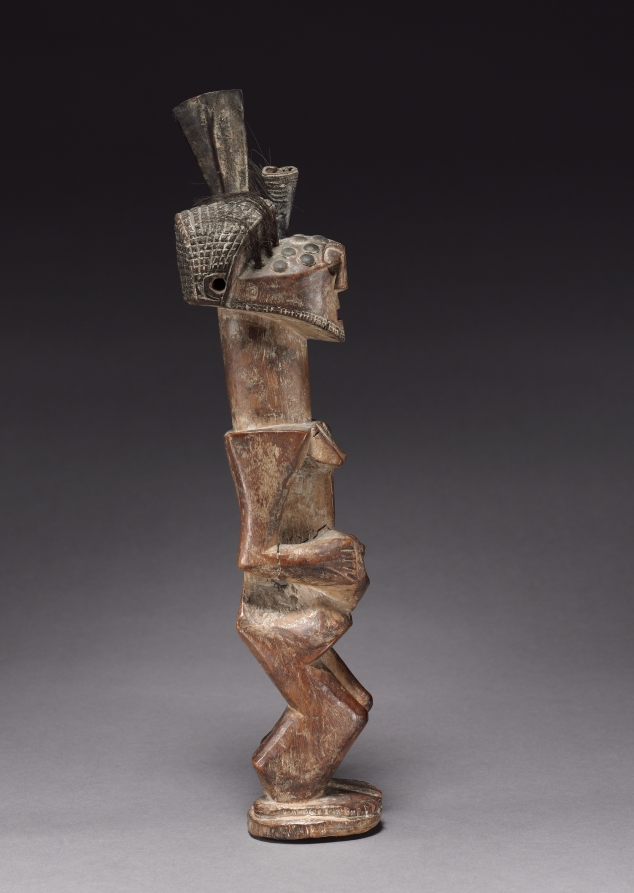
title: Female Figure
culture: Africa, Democratic Republic of the Congo, Songye people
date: late 1800s-early 1900s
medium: Wood, upholstery studs, antelope horns, and animal hair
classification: Sculpture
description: Mankishi figures were believed to have magical powers and were used by diviners to contact spirits in otherworldly realms. Smaller, personal power figures were used to connect with “common” ancestors, while the larger Mankishi figures contacted higher-ranking ancestral spirits. These power figures were kept in their own personal spaces because of their powerful status, and could only be handled by their designated nkunja, or guardian.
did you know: Because this Mankishi is neither small or quite large in size, it was most likely used by a family rather than an individual.